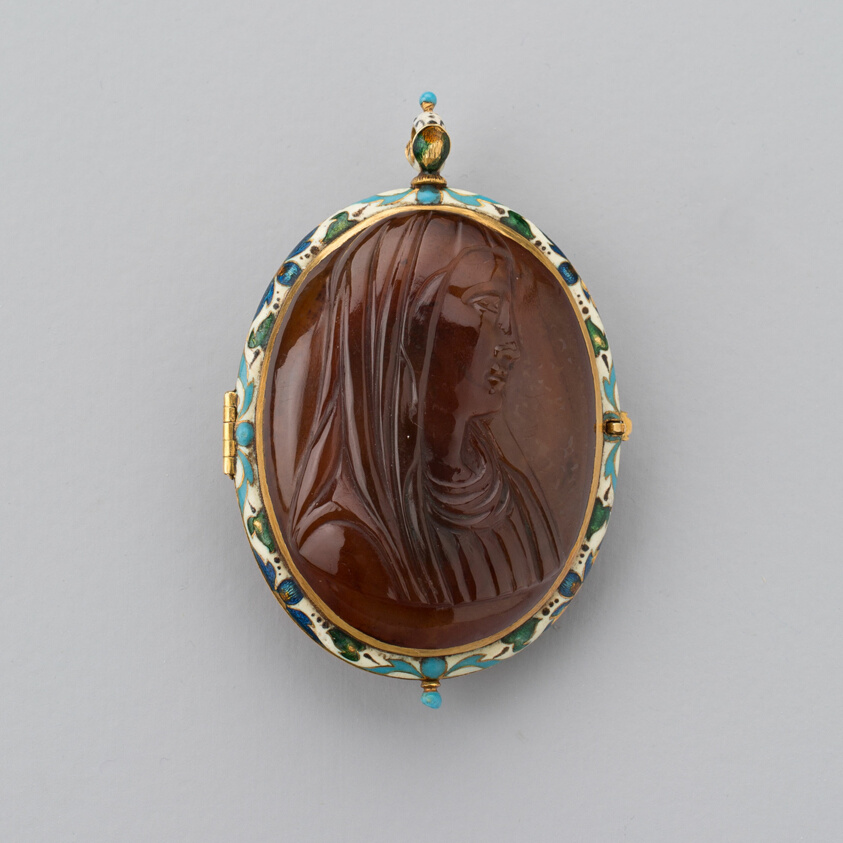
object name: Costume and Accessories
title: Double-Sided Pendant with Christ and Virgin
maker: Western European; Possibly French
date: 18th century (cameo); 17th century (mount)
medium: Hardstone, gold, and enamel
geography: France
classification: pendant (jewelry); jewelry; european decorative arts; costume